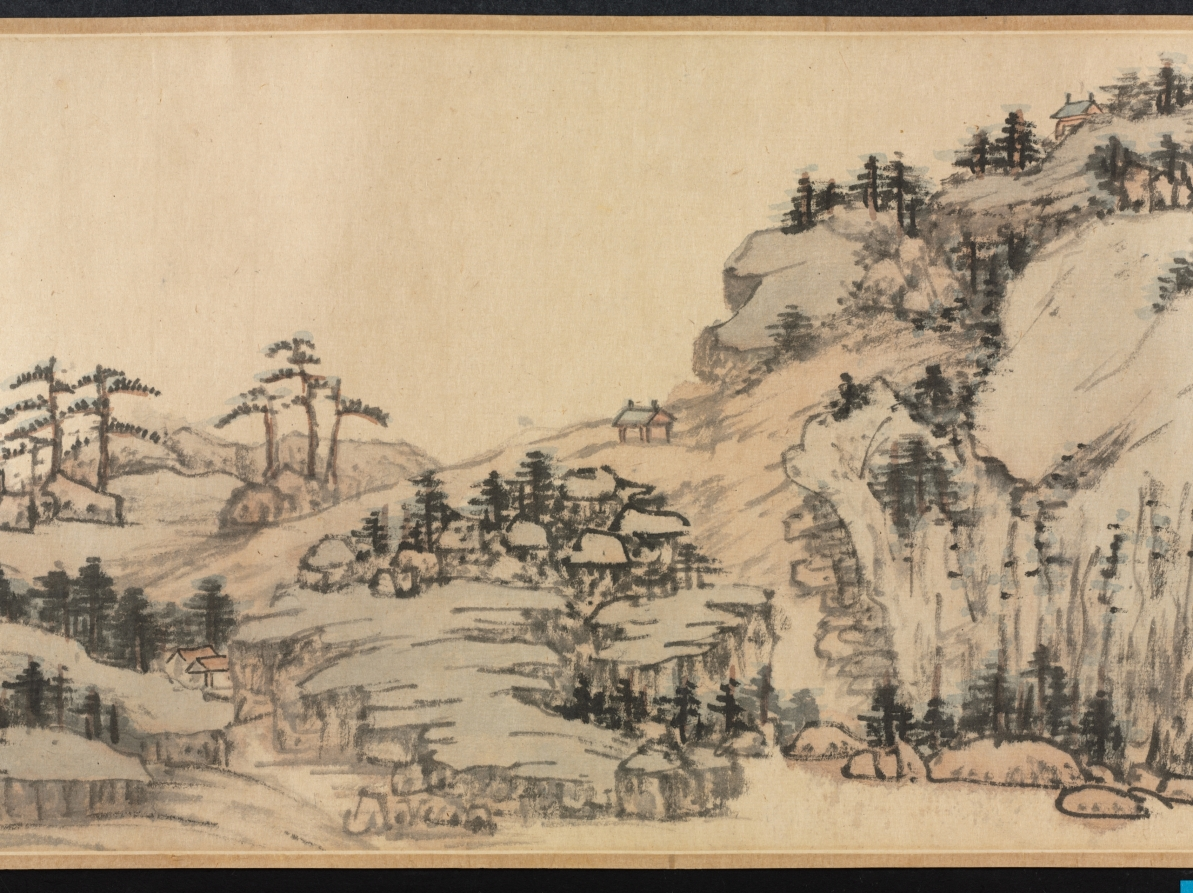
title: Dream Journey among Rivers and Mountains, no. 90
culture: China, Qing dynasty (1644-1911)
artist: Cheng Zhengkui (Chinese, 1604–1676)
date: 1658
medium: Handscroll; ink and color on paper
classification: Painting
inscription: 江山臥遊圖其九十, 青溪道人, 戊戌夏五。 [印] 程正揆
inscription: Title and inscription by Huang Yi 黃易 (1744–1802), and 3 seals.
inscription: 1 colophon and 9 additional seals: 3 seals of Dai Zhi 戴植 (active about 1821–1850); 1 colophon, dated 1914, and 3 seals of Yan Shiqing 顏世清 (1873–1929); 3 seals of Wang Nanping 王南屏 (1924–1985).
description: Cliffs and waterfalls interspersed with trees and dotted vegetation are spread over this handscroll. Long paths wind their way through villages, beside cottages, shrines, and over bridges. In the past, Chinese literati officials liked to take a “dream journey” along mountains and rivers when viewing landscape paintings in their studios. Scenery of this kind thus became a way to escape from the world of bureaucracy and administration. The painter Cheng Zhengkui used the title “Dream Journey” for a whole series of paintings, of which this is number 90. He is said to have painted 500 of them, but the actual count remains unknown.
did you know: Cheng Zhengkui planned to make 100 dream journey paintings but may have ultimately made 500.